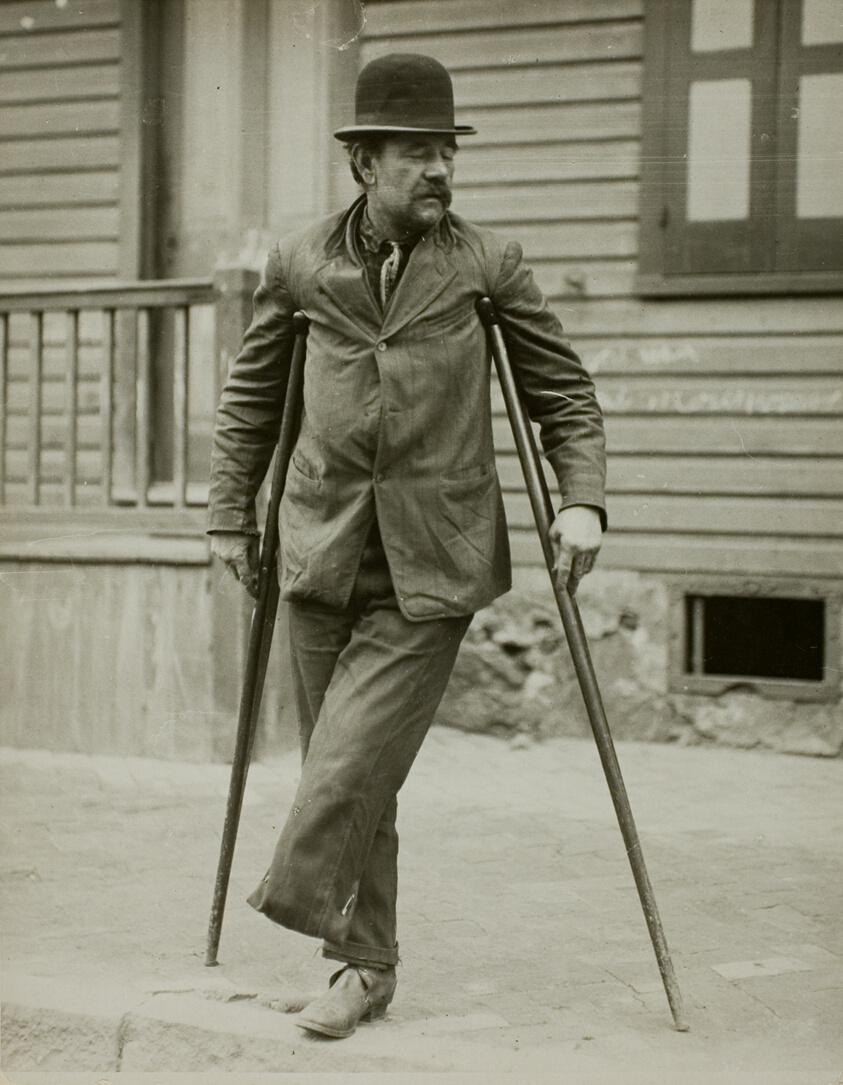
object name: Photograph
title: Industrial Hazard, Steel Worker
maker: Lewis Wickes Hine (American, 1874–1940)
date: c. 1915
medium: Gelatin silver print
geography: United States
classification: gelatin silver (developing-out-paper) pr; photographic process; photography; photograph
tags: documentary